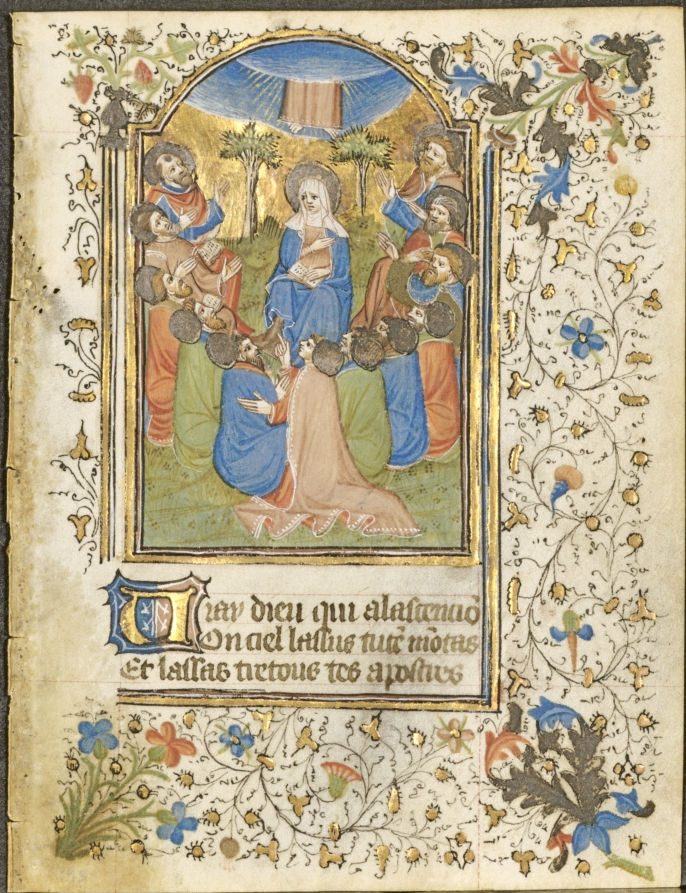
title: The Ascension: Leaf from a Book of Hours (4 of 6 Excised Leaves)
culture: France, Metz, 15th century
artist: Henri d'Orquevaulx (French)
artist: or Workshop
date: c. 1420–30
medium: ink, tempera, silver, and gold on vellum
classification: Manuscript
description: This leaf survives from what must have been an extraordinarily rich book of hours. The elaborate Passion cycle and Suffrages point to an important patron. Internal evidence within the original calendar and texts indicates that Metz was the probable place of production. Stylistically, the illuminations appear to come from the workshop of Henri d’Orquevaulx, a documented Metz manuscript painter. Compositionally, structurally, and stylistically, the miniatures suggest strong links to Netherlandish illumination. It is not known whether d’Orquevaulx came originally from the Netherlands or whether he simply worked or trained there at some point in his career.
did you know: Mostly used by women, books of hours are estimated to have been owned by every fourth household at the height of their popularity.